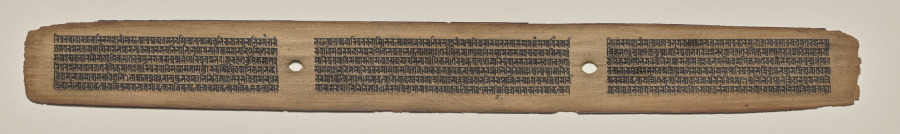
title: Text, Folio 6 (recto), from a Manuscript of the Perfection of Wisdom in Eight Thousand Lines (Ashtasahasrika Prajnaparamita-sutra)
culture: Eastern India, Bihar, Vikramashila Monastery. Painting: Nepal, Kathmandu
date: Sunday, September 14, 1119 (year 239 of the Newar Samvat in the month of Ashvina)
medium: ink and color on palm leaf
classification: Painting